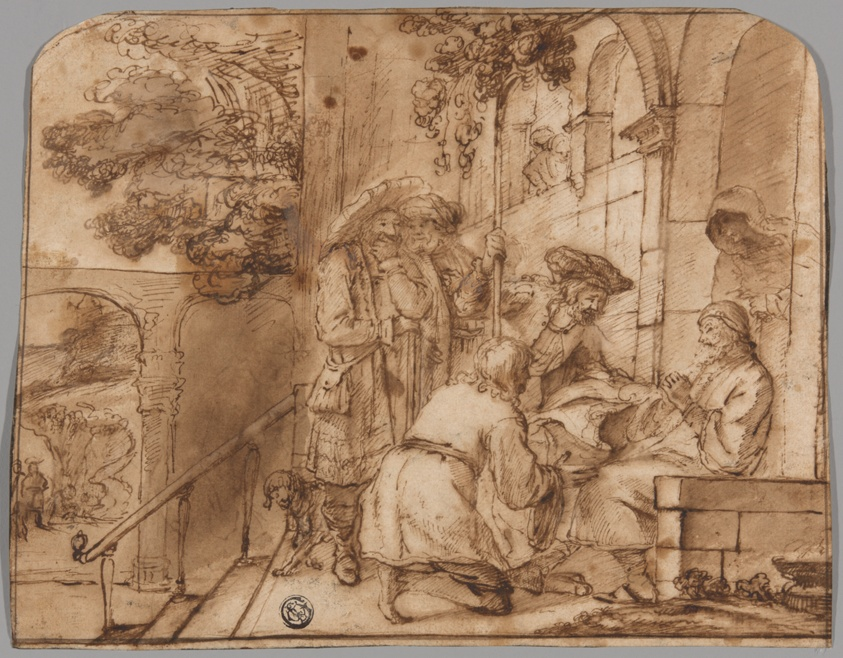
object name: Drawing and Watercolor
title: Joseph's Brothers Showing His Coat to Jacob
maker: Jan Victors (Dutch, 1619-1676)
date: 1640/49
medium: Pen and brown ink, with brush and brown wash, on cream laid paper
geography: Netherlands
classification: pen and ink drawings; drawings (visual works); prints and drawing